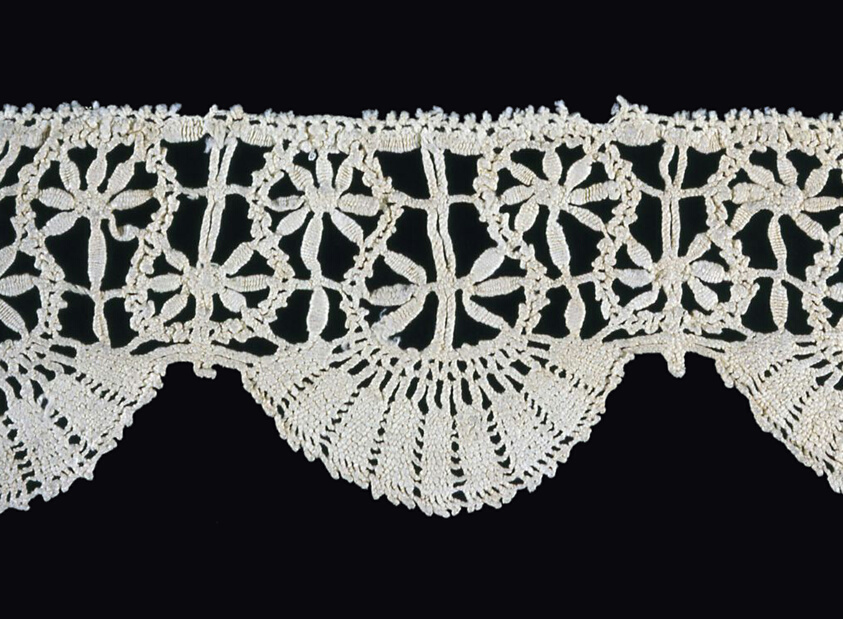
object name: Textile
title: Fragment (Border)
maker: Italy, probably Genoa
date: 1601/50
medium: Linen, bobbin straight lace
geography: Italy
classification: textile; lace - bobbin